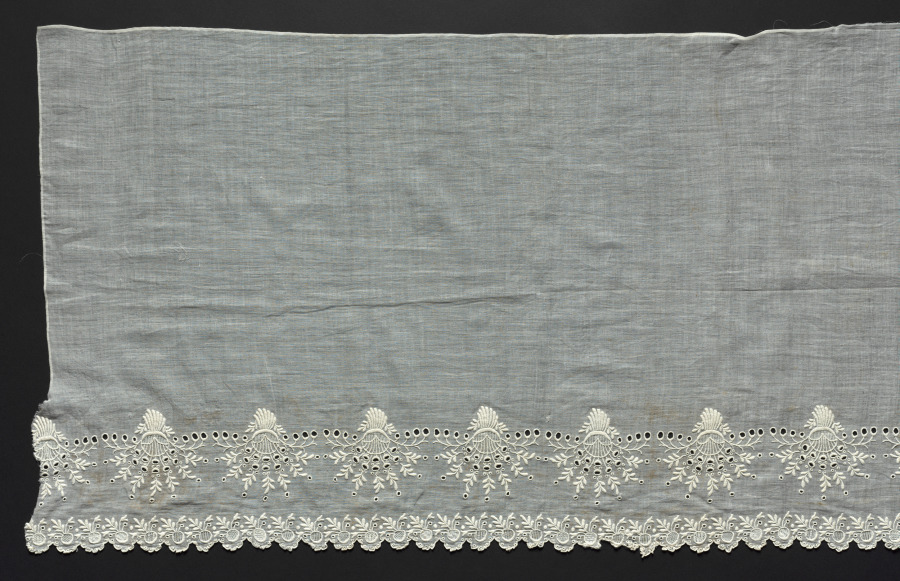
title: Portion of a Flounce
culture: Italy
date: 1800s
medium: Plain weave cotton: needle lace (drawnwork) and embroidery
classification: Embroidery